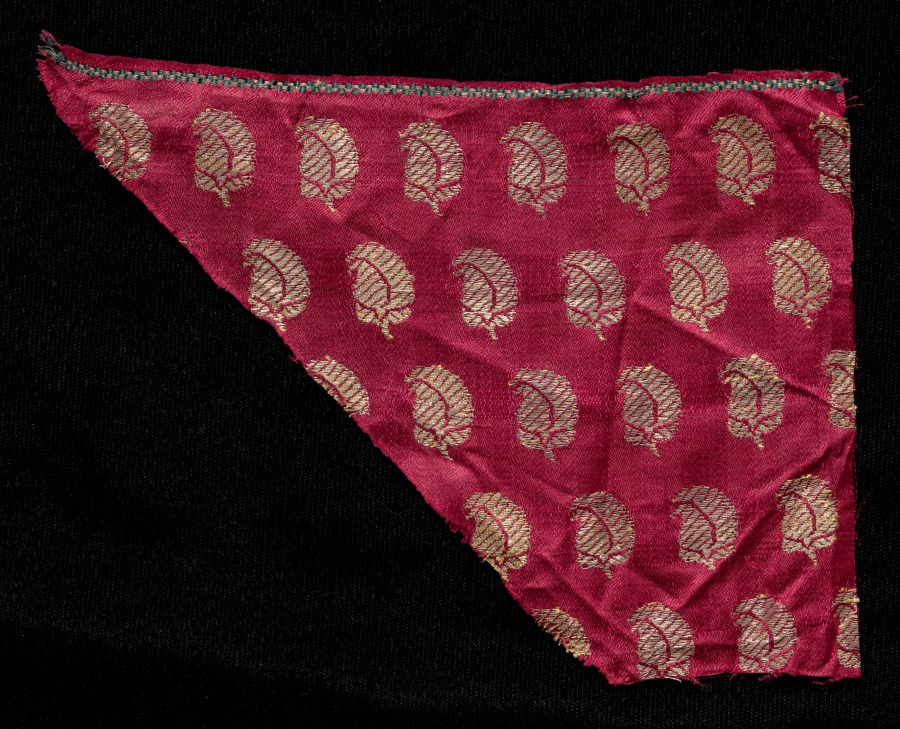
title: Fragment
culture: India, 19th century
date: 1800s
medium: brocade; silk and metal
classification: Textile